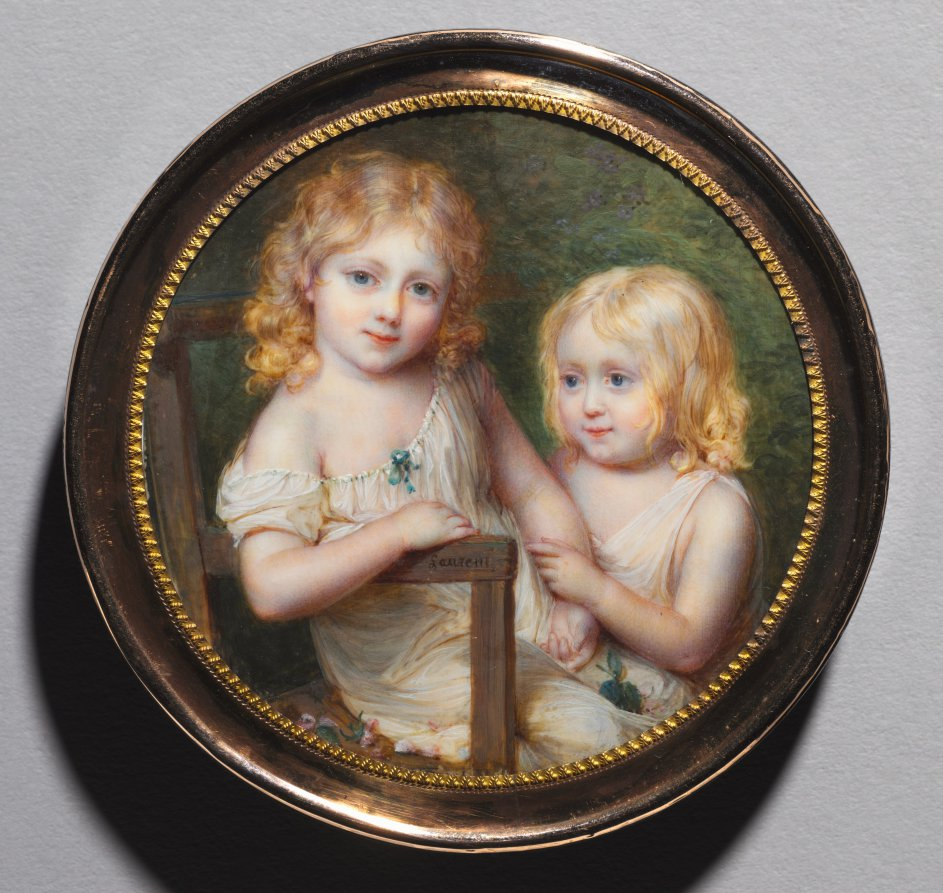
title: Portrait of the Artist's Children Emma and Paul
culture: France, 18th century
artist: Jean-Antoine Laurent (French, 1763–1832)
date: c. 1795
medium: watercolor on ivory, gold mount, set in the cover of a composition bonbonniere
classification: Portrait Miniature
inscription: signed at mid-center "Laurent"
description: This sensitive depiction of his children exhibits Laurent's ability to portray the psychological interiority of his subjects, young or old. The miniature shows Laurent's son and daughter in white chemise gowns with green ribbon accents. They both have striking blue eyes and slightly curled blond hair. The younger sibling tenderly holds the arm of the older one, who sits on a chair strewn with pink rose petals and inscribed with the artist's signature. The children are placed within an environment in which green foliage sprouts small blue and purple flowers. This organic setting reflects 18th-century Western philosophies of natural child rearing, characterized by treating childhood as a period of innocence distinct from adulthood and advocating that children not be treated as miniature adults but instead should have their naiveté celebrated. This philosophy influenced children's clothing. Instead of dressing children as small adults in constrictive costumes, both genders wore loose chemises, like the ones seen here, that encouraged mobility.